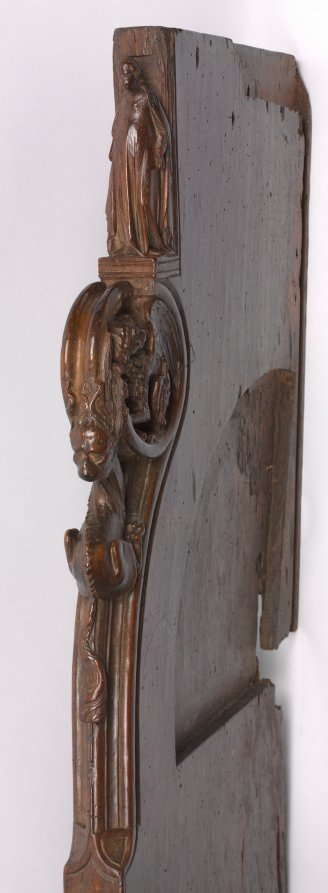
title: Panel from a Choir Stall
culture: Spain, Catalonia, Monastery of Pedralbes, 14th century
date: c. 1330–1340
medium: walnut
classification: Furniture and woodwork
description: The smaller panel here originated from an interior portion of a choir stall. The panel depicts a female figure in a long gown standing on a plinth above two of the apocalyptic beasts, the winged lion of Saint Mark and the winged ox of Saint Luke, which are supported by a wyvern (a heraldic winged dragon).